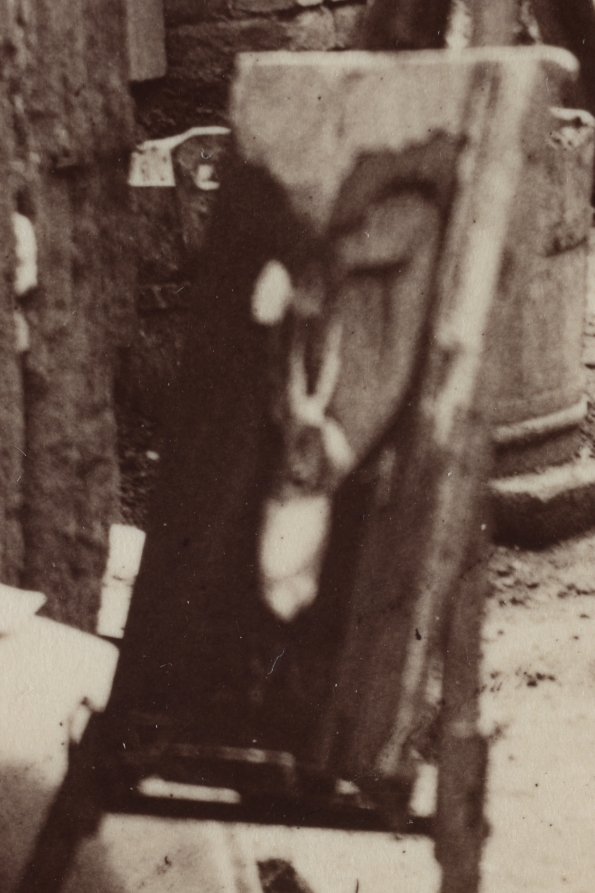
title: Courtyard with Painters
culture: France(?), 19th century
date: late 1860s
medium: albumen print from wet collodion negative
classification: Photograph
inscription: in pencil on reverse: Les Andeys (?) Cour & hotel, G713 and 695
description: This photographer inventively expanded the medium to create a rare example of both early genre (everyday life) photography and documentation of artists at work. The collodion negative captured a wealth of detail. The French village courtyard bustles with activity-the artist in the foreground hugs a squirming child and chats with his wife; a group of peasant women in the background heave huge bundles of laundry about in carts and baskets; and an innkeeper poses proudly for the camera outside his ivy-covered establishment. The diagonals of the sloping roofs and the textures of tiles, wood, and stone enhance the composition's visual interest. A luminous glow, absorbed by open canvas umbrellas, pervades the center of the scene.